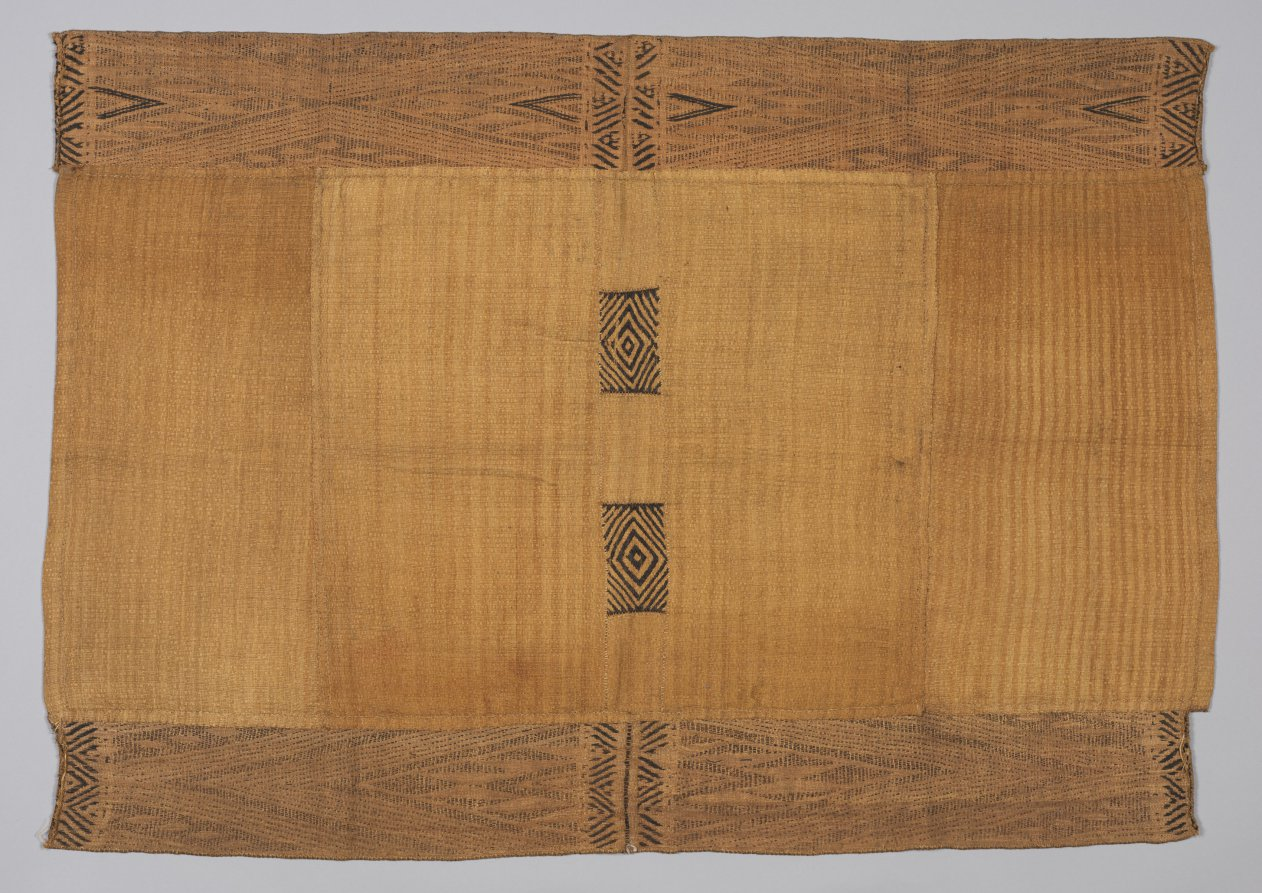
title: Woman's Skirt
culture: Africa, Central Africa, Democratic Republic of Congo, Mbuun-style weavers and embroiderers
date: late 1800s–about 1906–12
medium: Raffia palm fiber (Raphia ruffia or R. vinifera) and dye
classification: Garment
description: Mbuun men wove and embroidered wrap skirts like this for women to wear on special occasions. Gently color-shifted patterns (lubawa) along the central panels were achieved by “floating” wefts (selectively covering over vertical, or warp, threads with horizontal, or weft, threads). In contrast, various black-brown embroidered diamonds cover the borders. These are called lobubasa, motifs also seen on cicatrices (ornamental scars) that once beautified women’s bodies. Short tufts running horizontally and vertically across the textile were created by inserting extra fibers, then cutting and fluffing them with a knife. These add texture and hide the seams between woven panels.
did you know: The diamond motifs on this skirt have symbolic and cosmological links to lizards (mbil), an animal associated with matrilineal (female descent) clans.